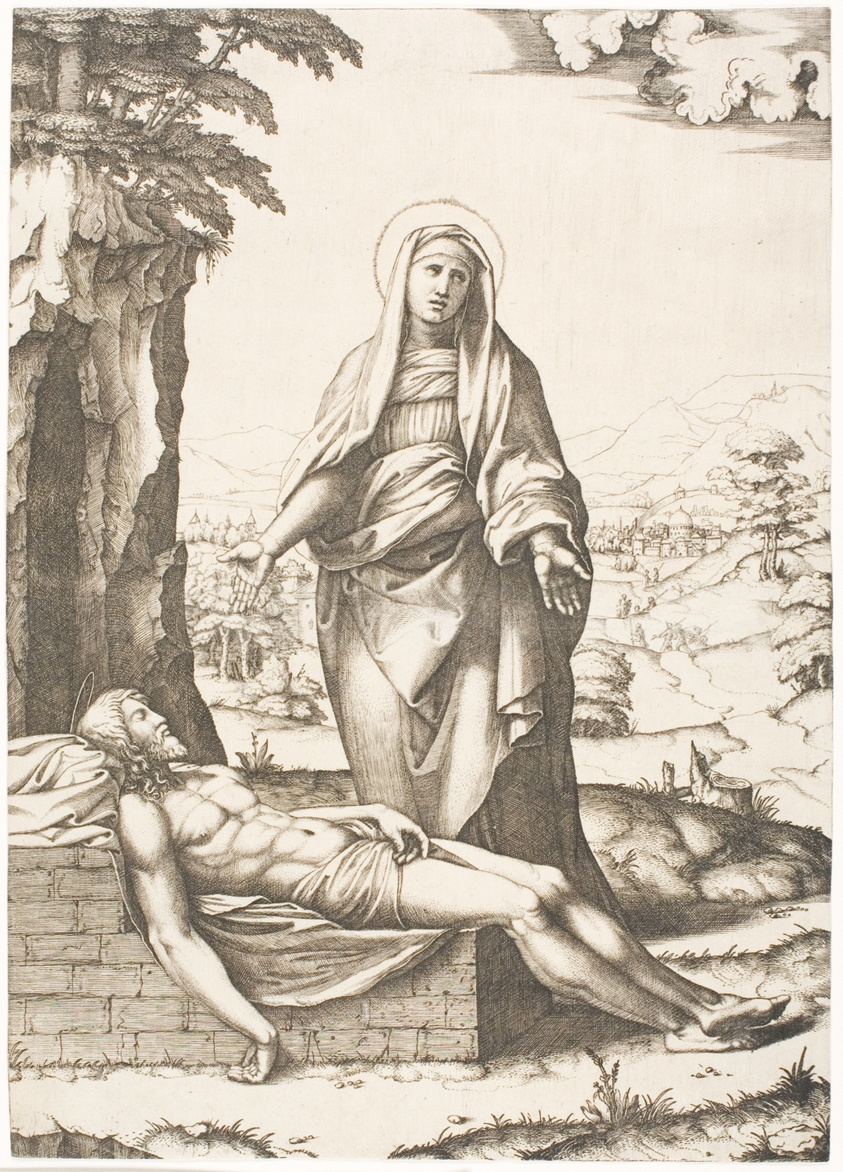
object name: Print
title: The Pietà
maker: Marcantonio Raimondi (Italian, c. 1480-1534); after Raffaello Sanzio, called Raphael (Italian, 1483-1520)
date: c. 1512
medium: Engraving in black on paper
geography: Italy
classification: engraving; print; prints and drawing